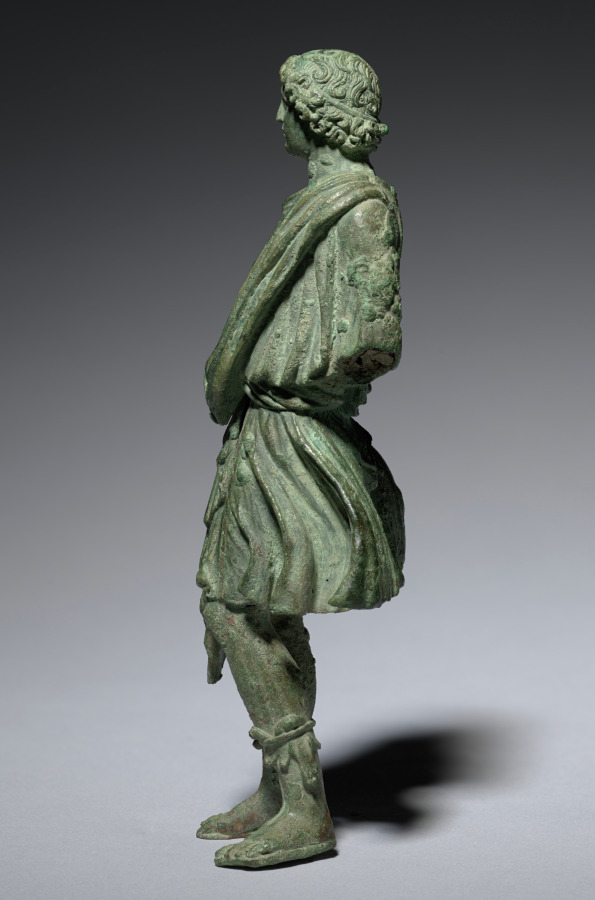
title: Lar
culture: Italy, Rome, Early Imperial period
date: 1–25 CE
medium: bronze with copper inlays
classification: Sculpture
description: This youthful bronze figure wears a short tunic with copper inlaid stripes and open-toed boots with animal-skin liners. The figure’s arms are missing, but based on other surviving examples, they likely held a libation dish and cornucopia. Even without these attributes, the figure can be identified through dress and stance as a type of Lar, or domestic deity, known as the Lar Familiaris (Household Lar), standing in a characteristic "quiet pose." Other types of Lares include the Lares Compitales and Lares Augusti (Lares of crossroads and of Augustus, respectively).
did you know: This statuette likely stood with other small bronzes in a household shrine called a lararium.